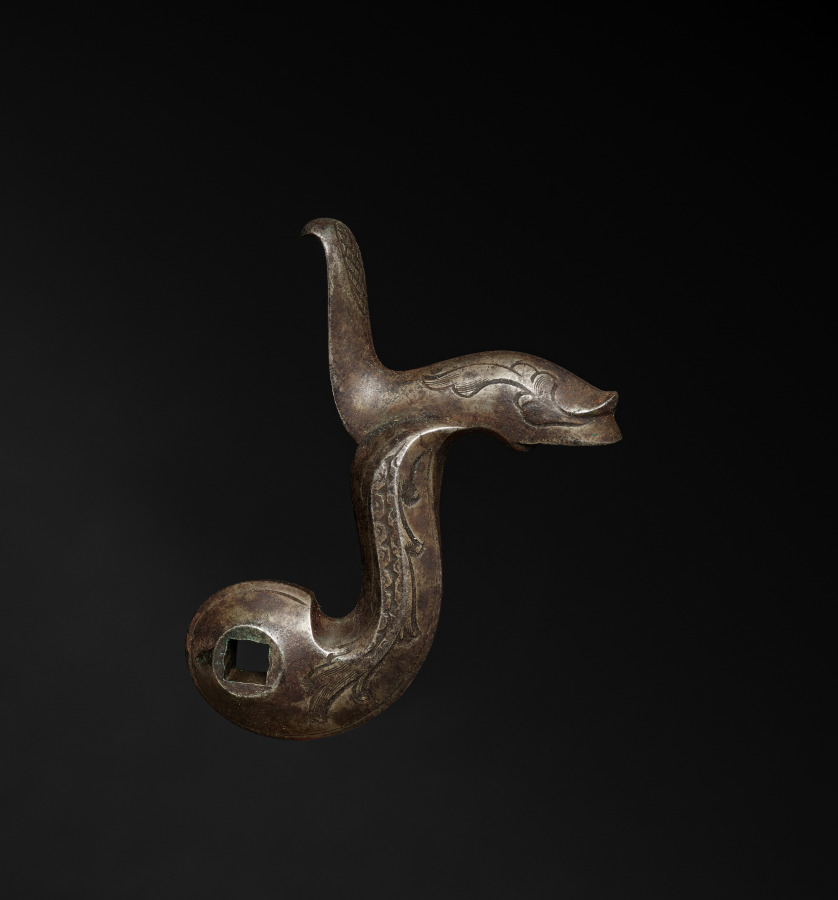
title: Gun-Lock Hammer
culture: England, early 19th century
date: c. 1800–1825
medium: steel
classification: Arms and Armor